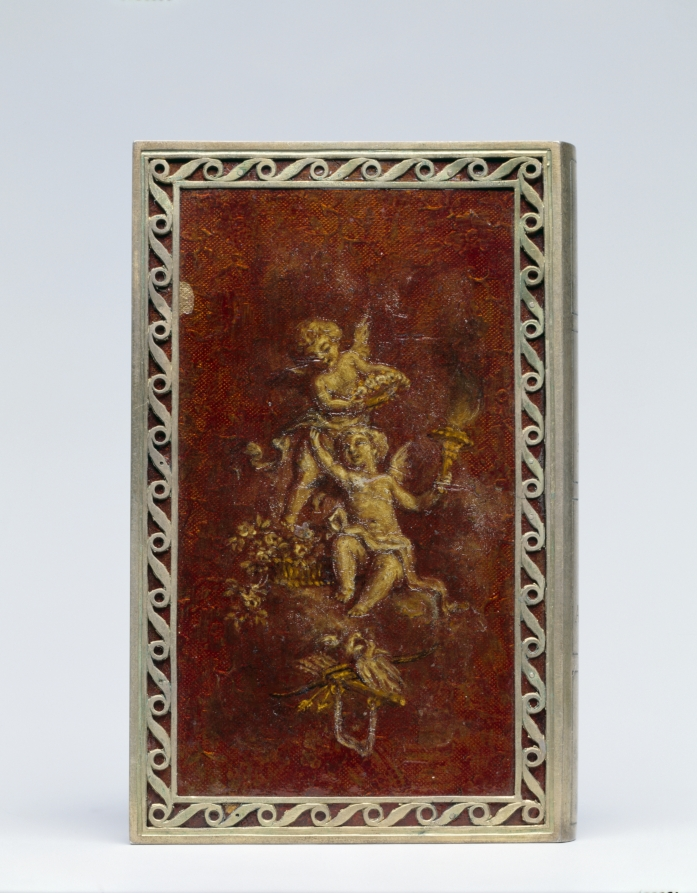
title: Box in the Form of a Book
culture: France, 19th century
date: 1800s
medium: brass with painted (lacquered ?) decorations; remains of gilding, especially inside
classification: Miscellaneous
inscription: engraved on spine: "L/ART/D/AIMER" (The Art of Love).